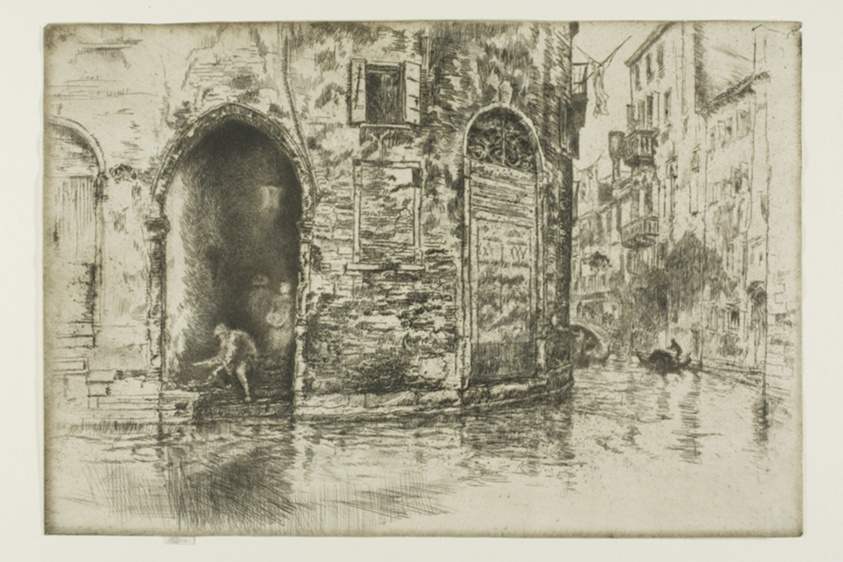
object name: Print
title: The Two Doorways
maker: James McNeill Whistler (American, 1834-1903)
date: 1879/80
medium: Etching and drypoint with foul biting in dark brown ink on off-white laid paper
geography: United States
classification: etching; foul biting; print; prints and drawing; drypoint; paper